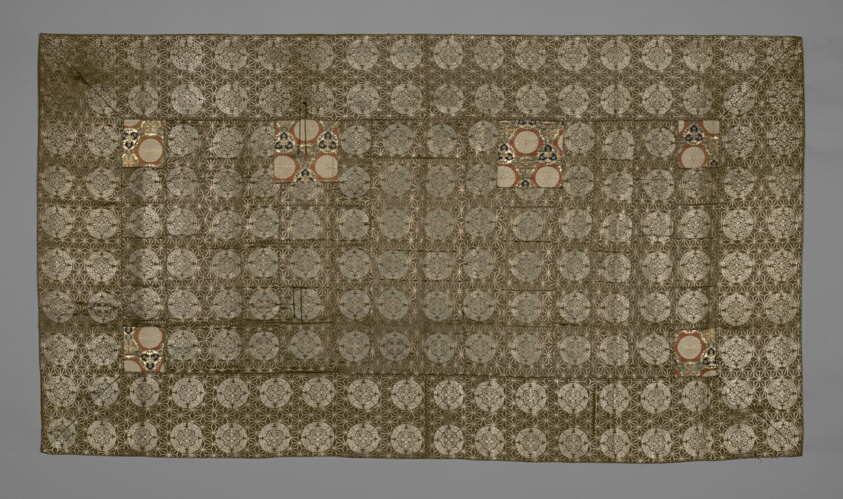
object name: Textile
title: Kesa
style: meiji, late edo, edo (japanese period)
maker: Japan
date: late Edo period (1789–1868)/ Meiji period (1868–1912), 1850/1900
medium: Silk and gold-leaf-over-lacquered-paper strip, warp-float faced 4:1 satin weave with supplementary patterning and brocading wefts; patches: silk and gold-leaf-over-lacquered-paper strip, warp-float faced 4:1 satin weave with weft-float faced 1:2 'z' interlacings of secondary binding warps and supplementary patterning wefts; lined with silk, 7:1 satin damask weave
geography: Japan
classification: textile; liturgical - buddhist; weaving